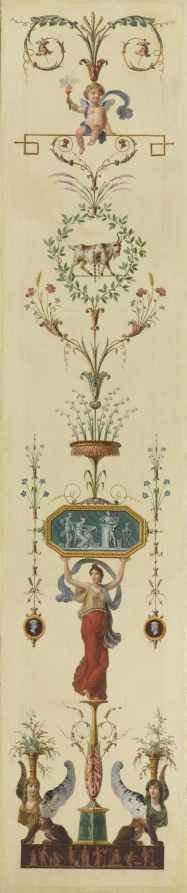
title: Decorative Panel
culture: France, 18th century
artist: Pierre Rousseau (French, 1751–1829)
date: 1790s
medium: oil on canvas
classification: Painting